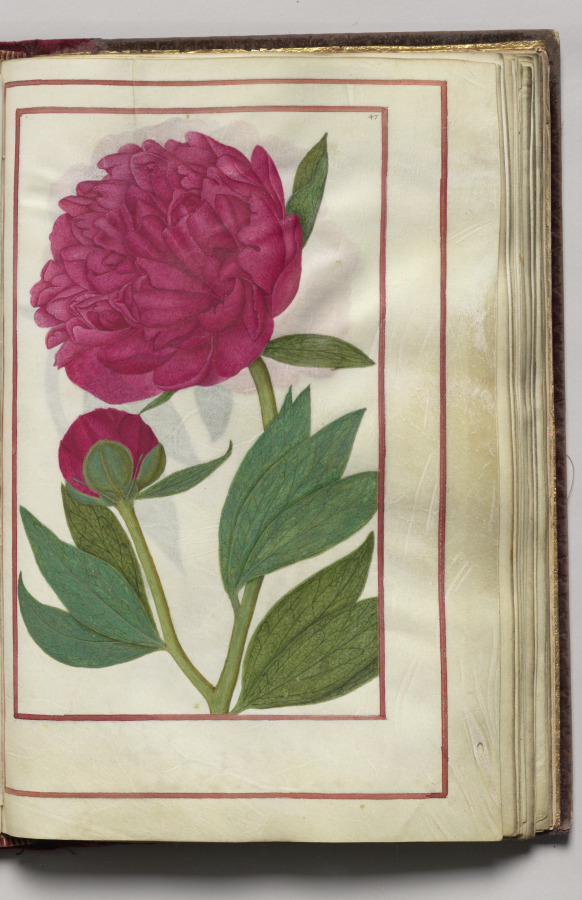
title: Red Peony, folio 24 (recto), from Florilegium (A Book of Flower Studies)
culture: France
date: 1608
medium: watercolor, ink, silver, and gold over occasional traces of pencil, on vellum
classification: Bound Volume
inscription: Dated: Poitiers 1608 (on frontispiece) Signed: On frontispiece in black ink, lower right: Van Kuyk Notation on drawing: Frontispiece: in pencil, lower margin: * élève de Van Kessel, peintre flammand (* in pencil also appears in front of Van Kuyk's name).